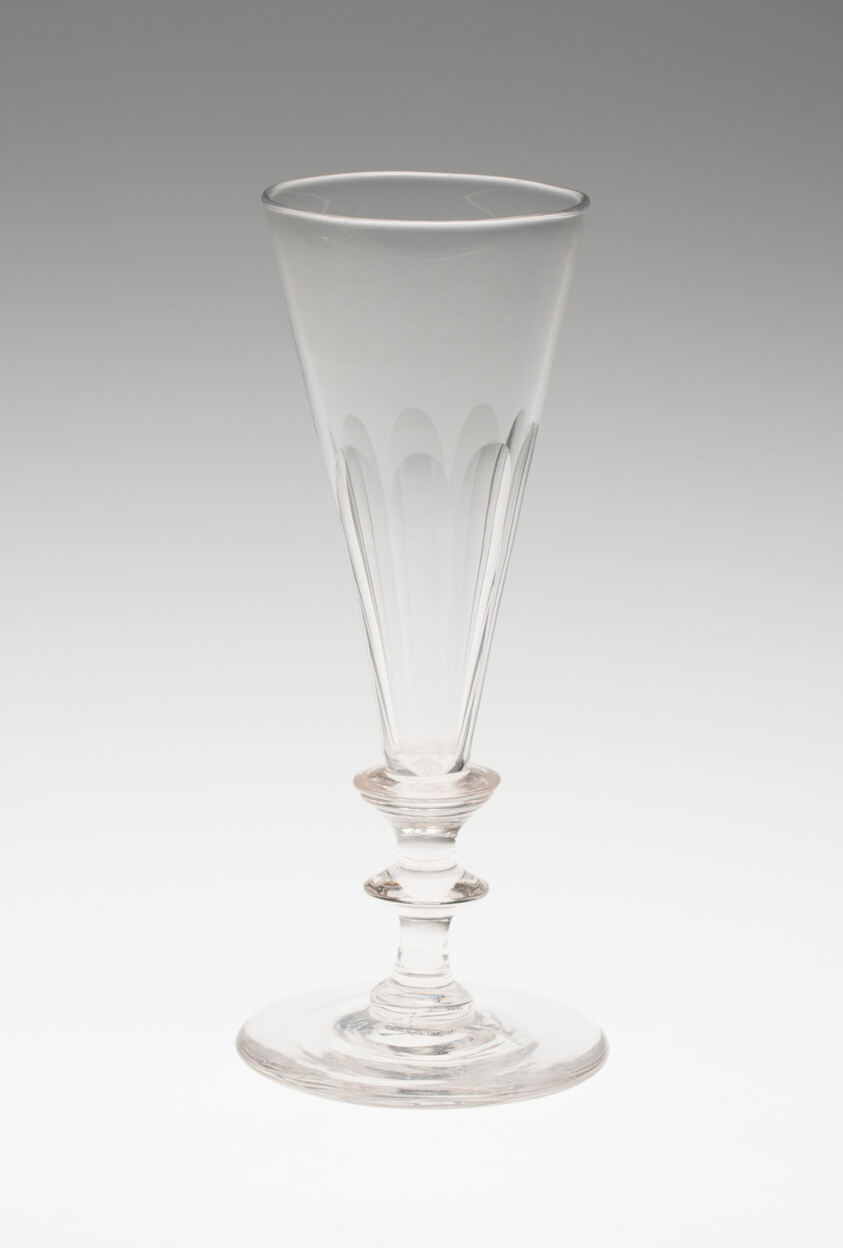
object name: Glass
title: Flute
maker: England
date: 18th century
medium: Glass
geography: England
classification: glass